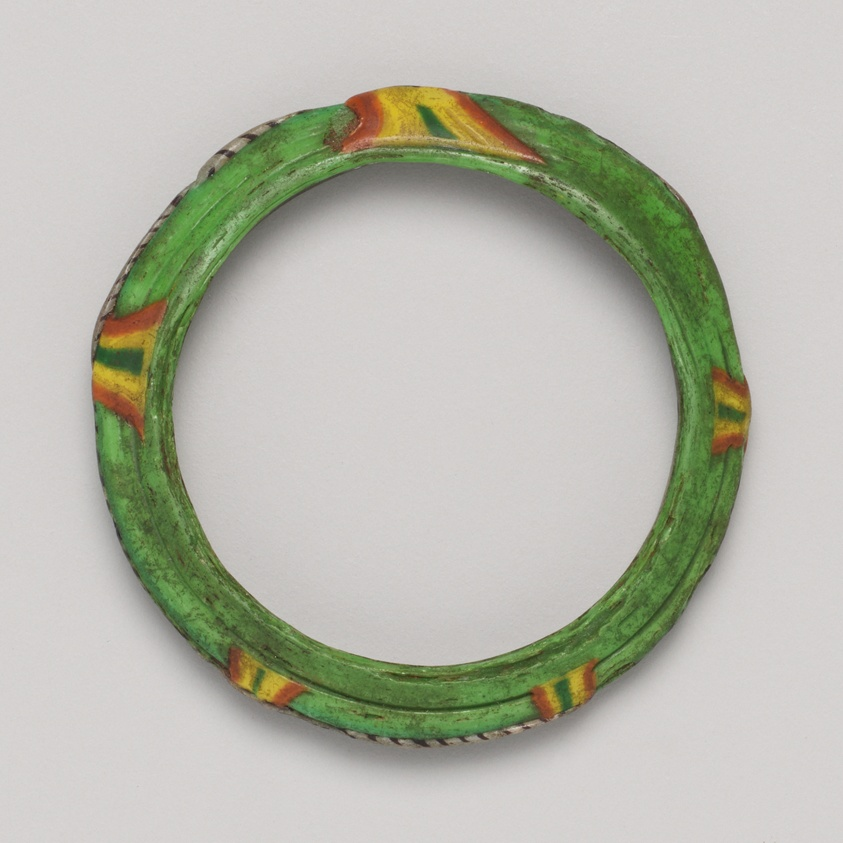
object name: Costume and Accessories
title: Bracelet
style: greco-roman (egyptian)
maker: Islamic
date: 14th-15th century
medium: Glass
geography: Egypt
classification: glass; jewelry; ancient art; costume